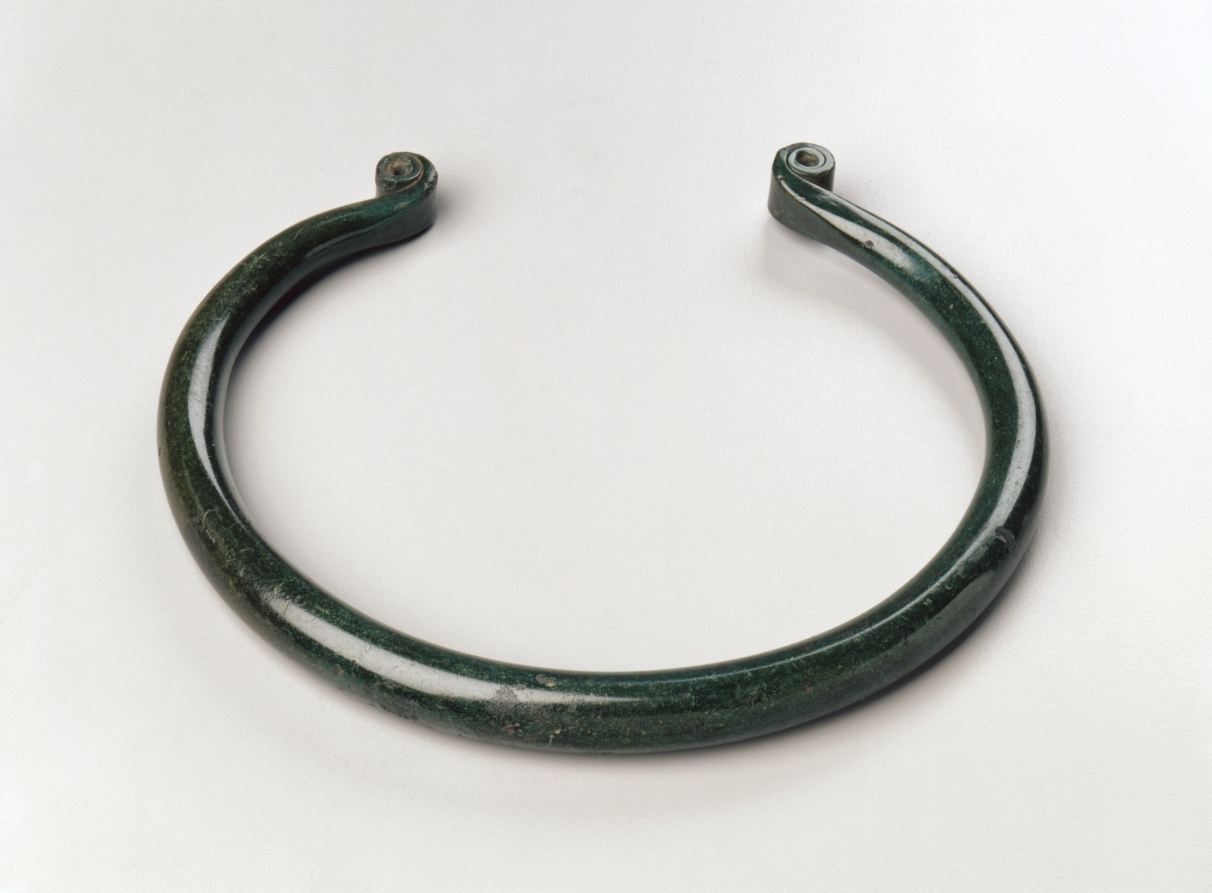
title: Ingot Torque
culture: Hungary, Bronze Age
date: c. 1500 BCE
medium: bronze, wrought bronze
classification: Metalwork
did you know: A torque is a neck ornament usually made of metal.